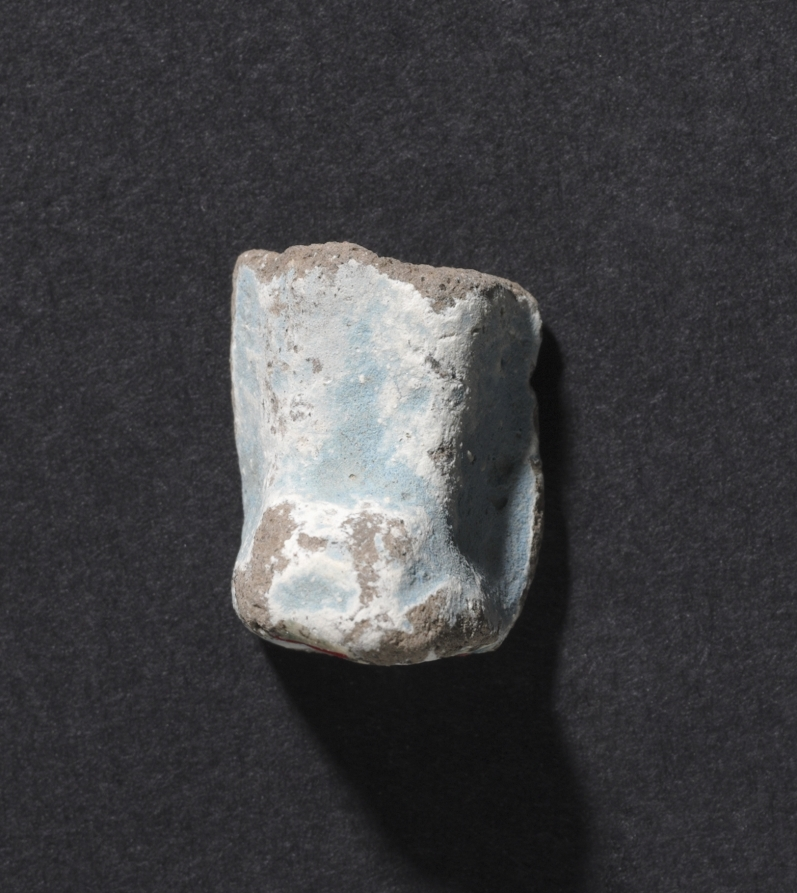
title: Shawabty of Ditamenpaankh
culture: Egypt, Late period (715–332 BCE), Dynasty 25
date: 715–656 BCE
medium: terracotta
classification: Funerary Equipment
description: High demand for shawabtys in the Late Period, a time when as many as 400 or more shawabtys were placed in the tomb with the deceased, gave rise to a specialized container for storing them: the shawabty box. This example is inscribed for the lady of the house, Ditamenpaankh, and was probably one of a pair originally made for her. The single-masted boat on the box's lid is perhaps an allusion to the pilgrimage of the deceased to the holy city of Abydos, the cult city of Osiris, king of the dead. The shawabtys inside are crude, mass-produced examples cast in an open mold. Made of terracotta, their blue paint imitates more costly shawabtys made of faience. As for the shawabty spell, it has been removed from its traditional location on the shawabty's front and relocated onto the sides of box, where it needed only to be written once, thus expediting production.